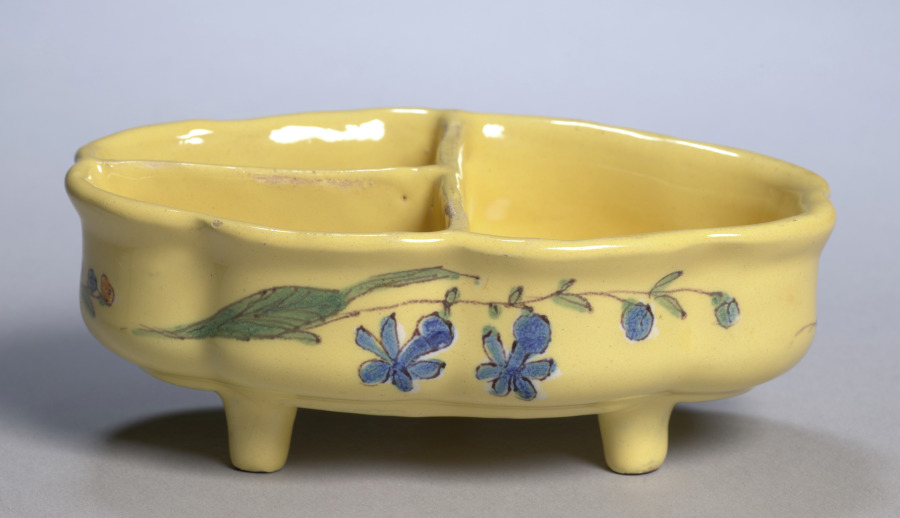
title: Spice Bowl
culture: France, Montpellier, 18th century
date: c. 1775–80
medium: faience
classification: Ceramic